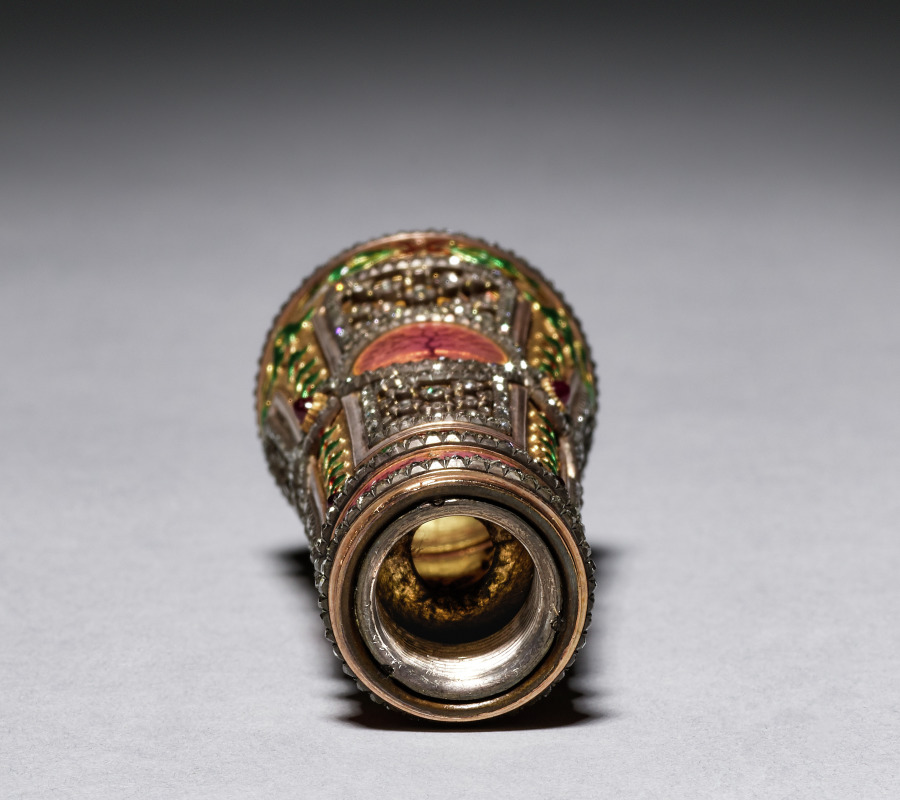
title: Parasol Handle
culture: Russia, St. Petersburg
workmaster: Michael Evlampievich Perchin (Russian, 1860–1903)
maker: House of Fabergé (Russian, 1842–1918)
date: c. 1886–1903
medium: Gold, enamel, diamonds, and platinum filigree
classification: Metalwork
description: Women devised many methods to protect themselves from the sun when strolling outside at the end of the nineteenth century. One constant barrier from the harsh rays was the daytime parasol which looked like an umbrella but was used strictly for shade. The House of Fabergé specialized in providing fashionable wealthy ladies with bejeweled handles such as this example, which could be screwed directly into the end of the parasol shaft when a more formal look was desired.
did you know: A wealthy lady around 1900 could unscrew her jeweled parasol handle and take it with her for safekeeping or swap it for another color.